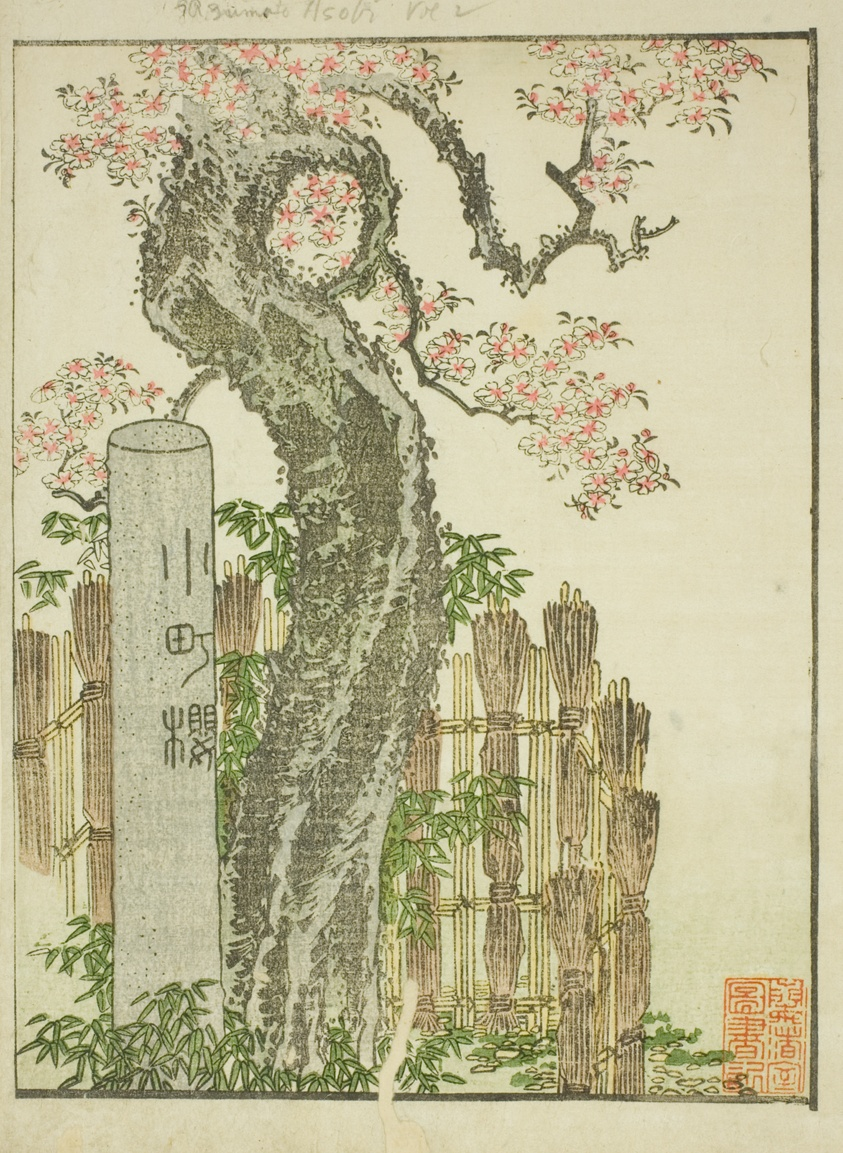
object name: Print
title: Komachi Cherry Tree (Komachi zakura), from the illustrated book "Picture Book of Amusements of the East (Ehon Azuma asobi)"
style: Japanese (culture or style)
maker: Katsushika Hokusai 葛飾 北斎; Japanese, 1760-1849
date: c. 1802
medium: Color woodblock print; page from illustrated book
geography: Japan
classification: woodblock print; print; asian art